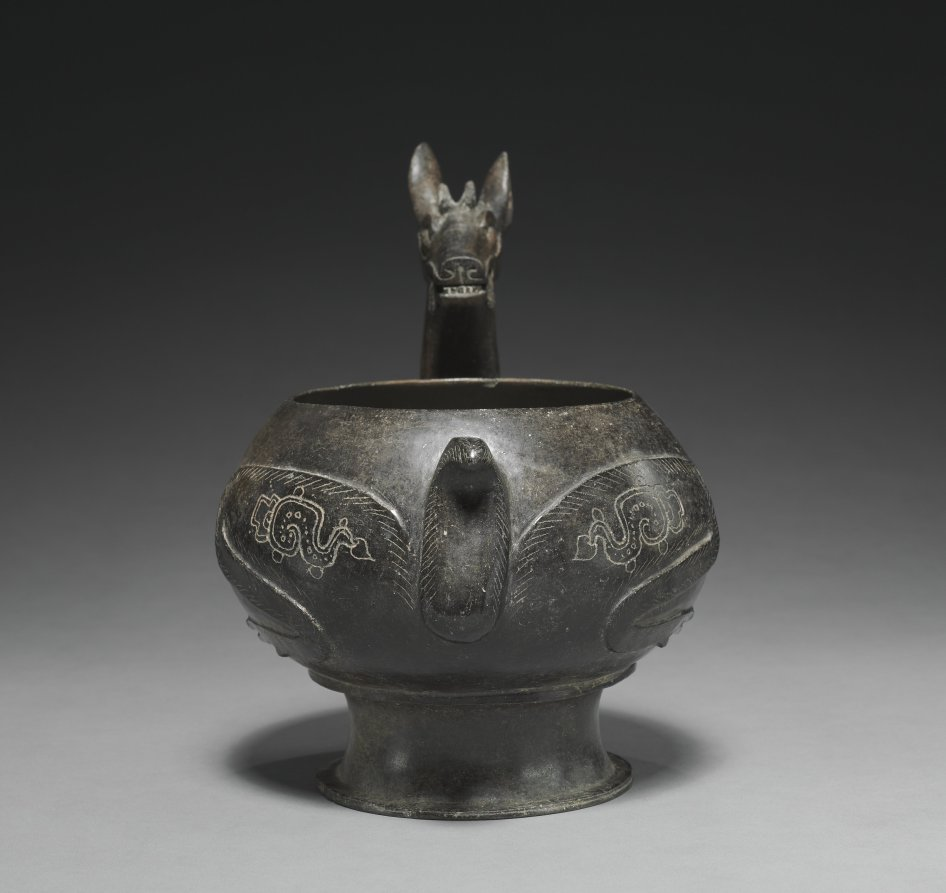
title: Deer Effigy Vessel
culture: Mesoamerica, Maya style, Classic Period (250-900)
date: 250–600 CE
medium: earthenware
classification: Ceramic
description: Maya artwork from the Early Classic Period (about AD 250-600) is dominated by three-dimensional sculpture in jade, stone, wood, and especially ceramic. This vessel is an exceptionally elegant example of Maya blackware, produced by firing earthenware pottery in a reducing (low oxygen) atmosphere. The deer is frequently depicted in Maya art, usually as a victim of either hunting or sacrifice. Venus signs and conch shells engraved on the deer also suggest death, for the planet Venus was regarded as a bringer of ill-fortune, and conch shell trumpets were carried by hunters. The small frog or toad pressed firmly under the deer's hoof relates to agricultural fertility. The croaking of these amphibians was a harbinger of rain.